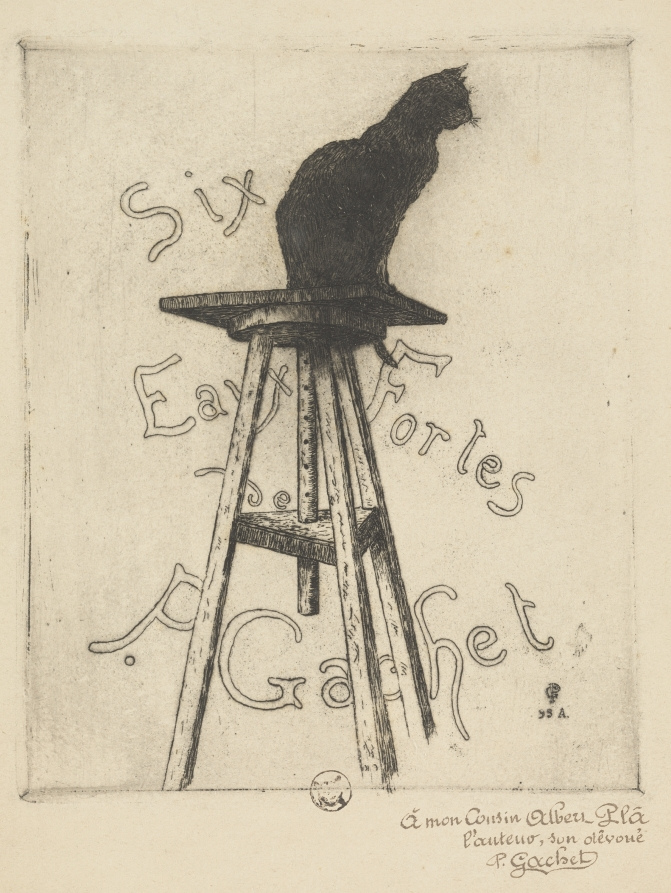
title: Six Etchings: Frontispiece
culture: France, 19th century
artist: Paul Gachet (French, 1828–1909)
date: 1895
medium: etching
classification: Print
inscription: annotated lower right margin, in ink: "A mon Cousin Albert Plâ l'auteur son dévoué Paul Gachet"